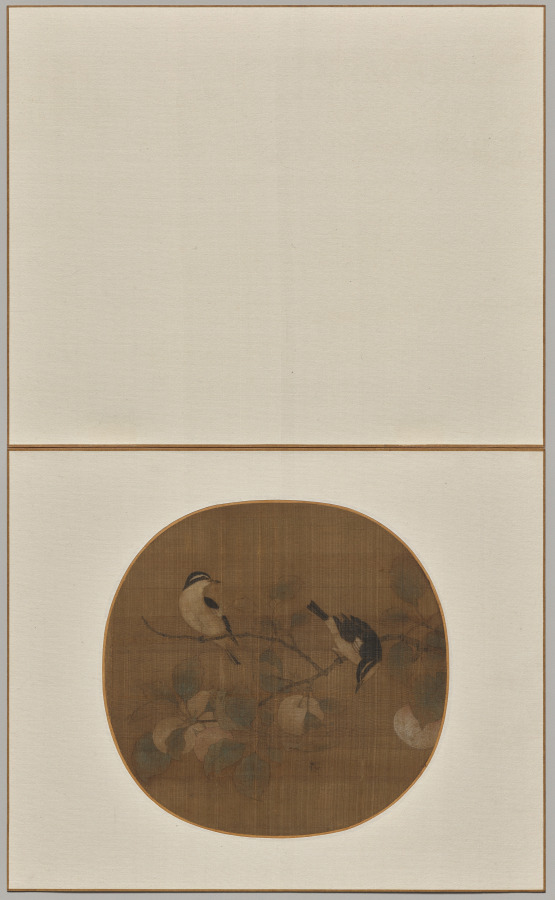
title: Birds on a Peach Branch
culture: China, Southern Song dynasty (1127–1279)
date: 1100s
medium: Album leaf; ink and light color on silk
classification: Painting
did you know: An insect is drawn to the scent of the ripe peaches. Is the bird going to catch it?